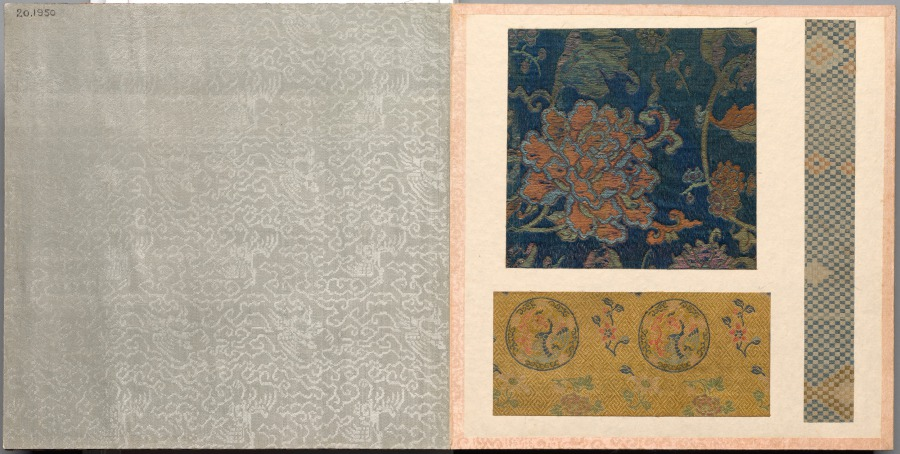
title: Album of Textile Samples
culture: Japan and China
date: 1700s–1800s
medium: silk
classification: Textile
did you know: This album contains 46 pages with 156 mounted Chinese or Japanese textile samples.